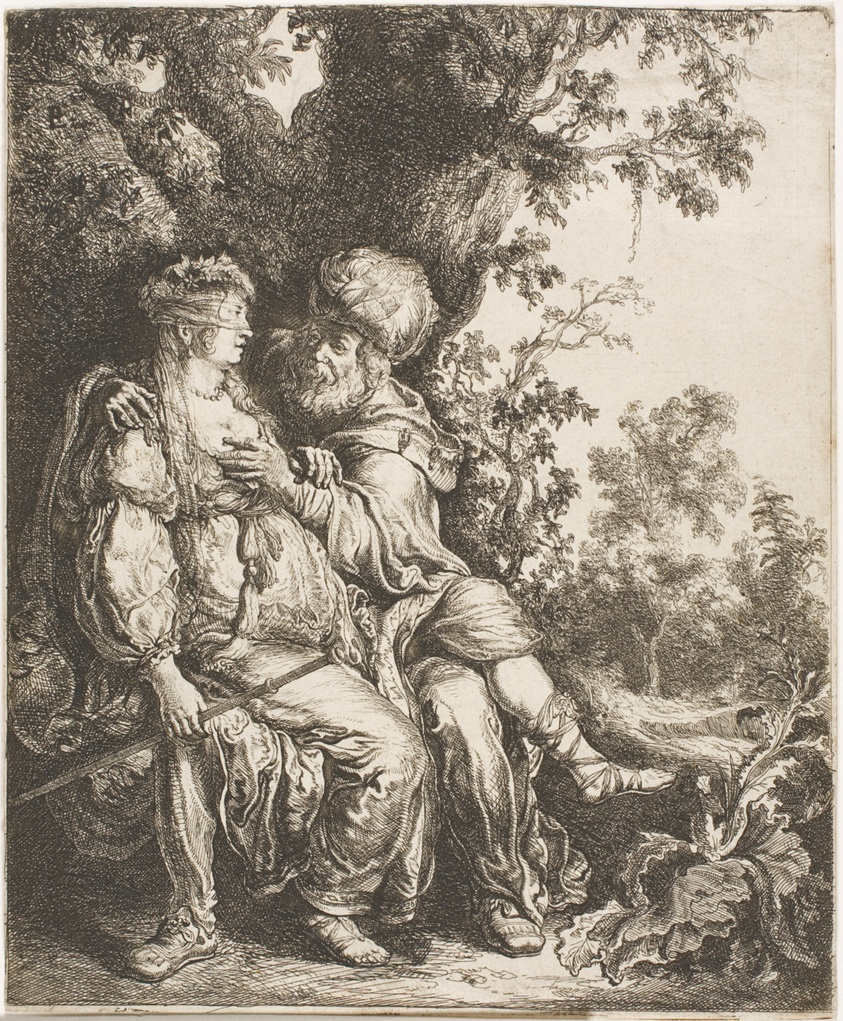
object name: Print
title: Juda and Thamar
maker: Pieter Lastman (Dutch, 1583-1633)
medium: Etching on ivory laid paper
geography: Holland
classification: etching; print; prints and drawing